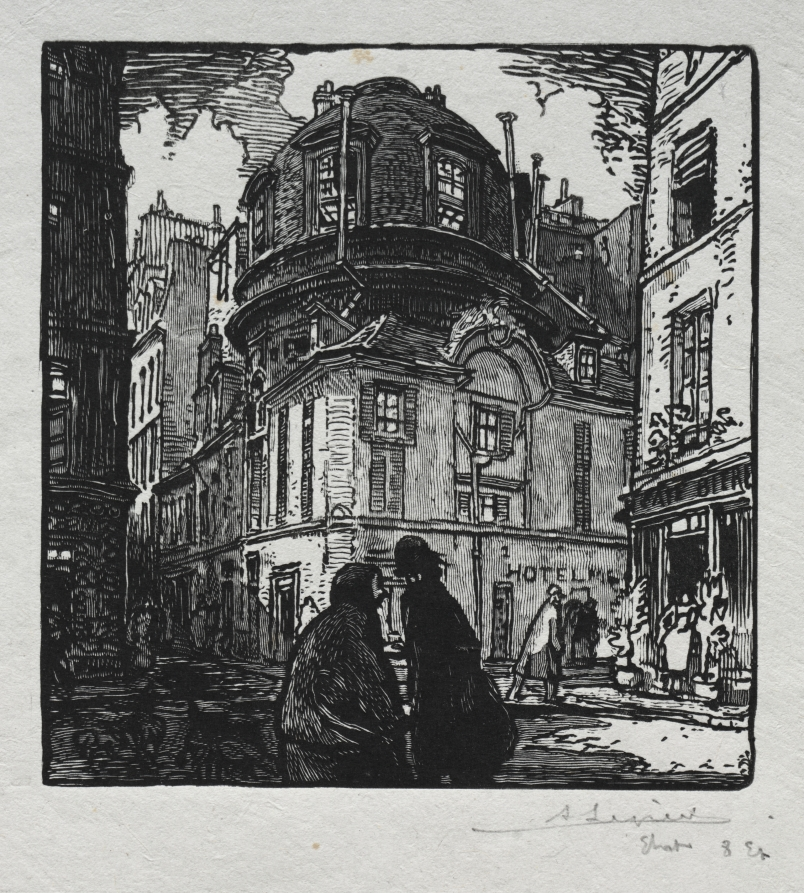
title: View of the Hotel Colbert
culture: France, late 19th-early 20th Century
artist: Auguste Louis Lepère (French, 1849–1918)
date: 1901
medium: wood engraving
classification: Print